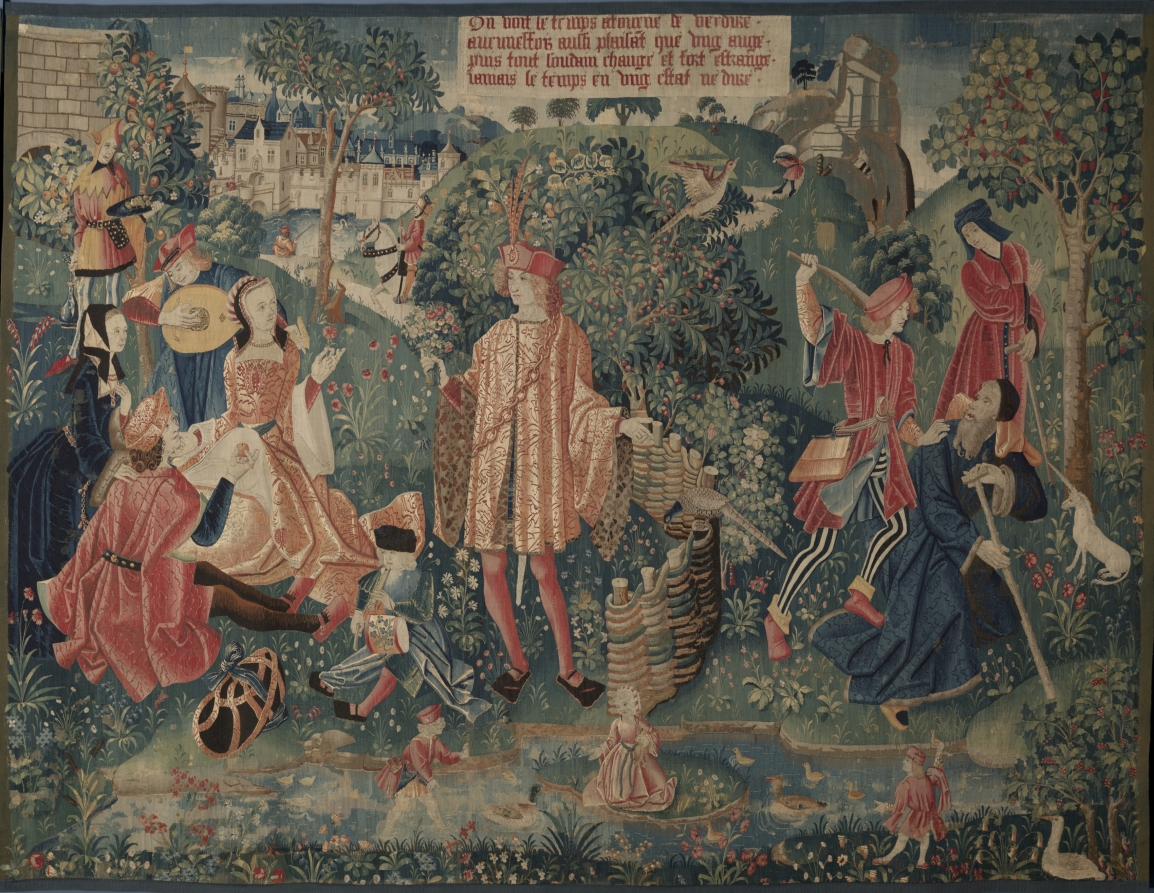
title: Time (from Chateau de Chaumont set)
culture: France, Lyon(?), early 16th century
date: 1512–15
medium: silk and wool; tapestry weave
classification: Tapestry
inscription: French verse in Gothic letters translates as follows: "One sees the weather adorned in green, Sometimes as pleasing as an angel; To suddenly change and be quite strange, The weather never stays the same."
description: Pierre Sala, who likely commissioned the set, is portrayed as the richly attired central figure offering a bouquet, a symbol of knowledge, to Éléonore, his daughter. Éléonore is pregnant, revealed by her upturned skirt and the persimmon in her husband Hector’s hand. Hector’s mother, Marguerite, in dark attire, will wed the widowed Sala in 1519. They appear in front of the royal chateau of Blois. The figures at the right convey Sala’s advice to his children. Time (the old man with the staff) with Clio, the Muse of History, standing on his shoulders, is being attacked by a Herculean youth wielding a stick. With this allegory, Sala is explaining that youth is ignorant of the complexities of life and time. The small unicorn at the far right represents the soul. The verse in Old French at the top refers to changing time: One sees Time adorned with green foliage, Sometimes as pleasant as an angel, Then suddenly change and become quite strange. Never does Time persist in one state.